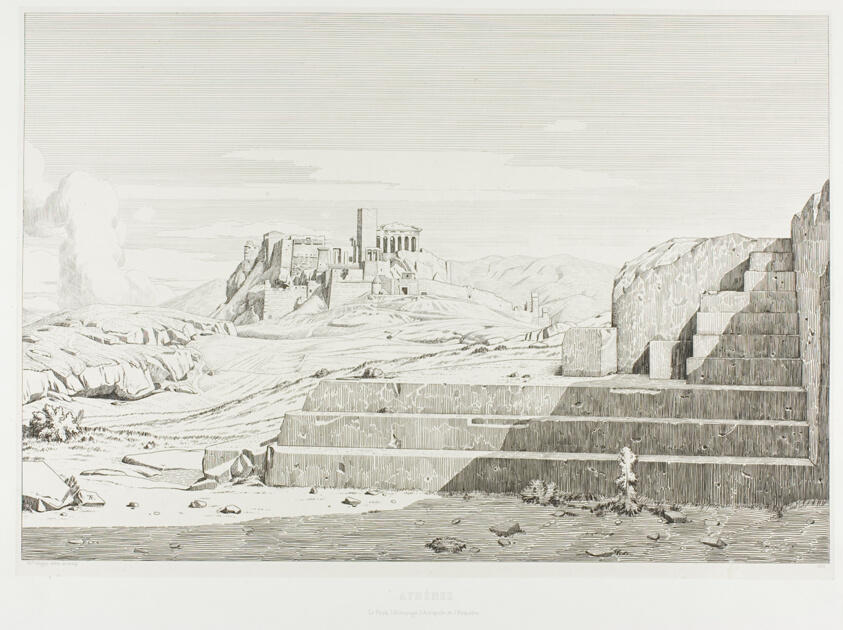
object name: Print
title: The Acropolis, Athens: The Pnyx, Areopagus, Acropolis and Mount Hymmettos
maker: Théodore Caruelle d'Aligny; French, 1798-1871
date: 1845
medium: Etching on ivory China paper, laid down on white wove paper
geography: France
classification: etching; print; prints and drawing